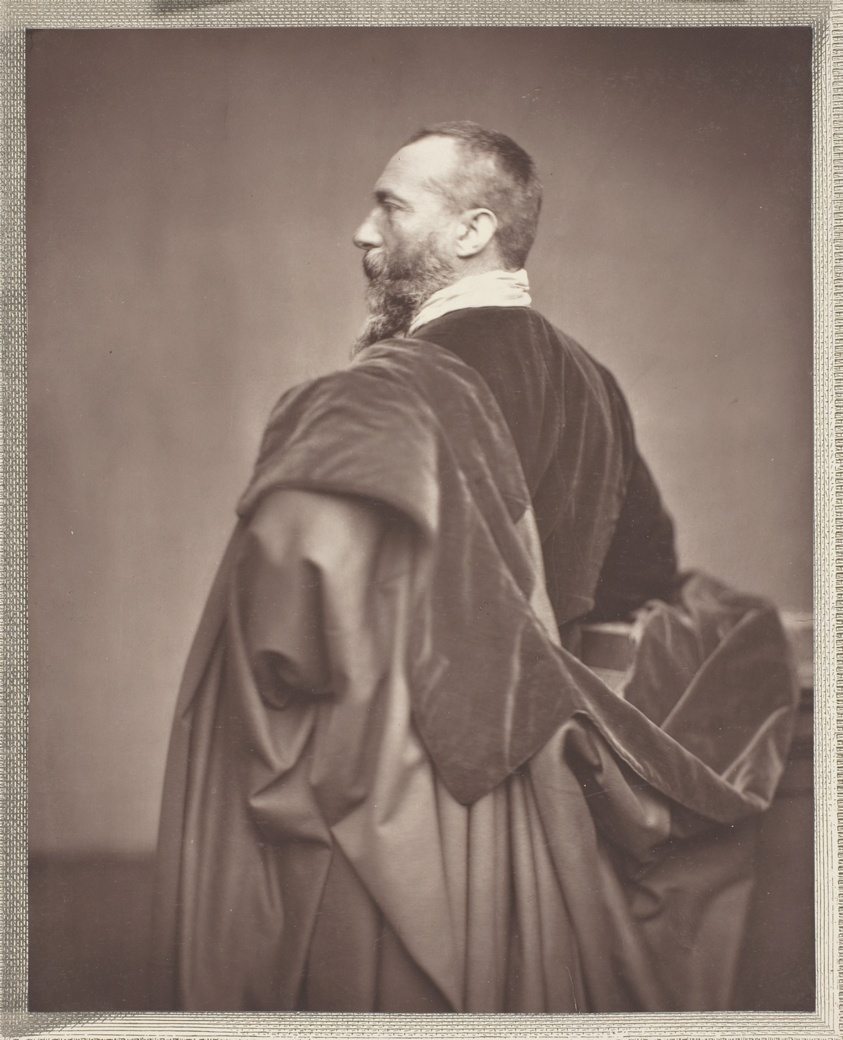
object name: Photograph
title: Jean-Baptiste Alphonse Karr (French critic, journalist, and novelist, 1808-1890)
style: 19th century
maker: Antoine Samuel Adam-Salomon (French, 1811–1881)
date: c. 1876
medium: Woodburytype, from the periodical “Galerie Contemporaine Littéraire, Artistique” (1877), volume 2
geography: France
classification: woodburytype; photomechanical process; photography; photograph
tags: Collected by Hugh Edwards, Contemporaine Littéraire